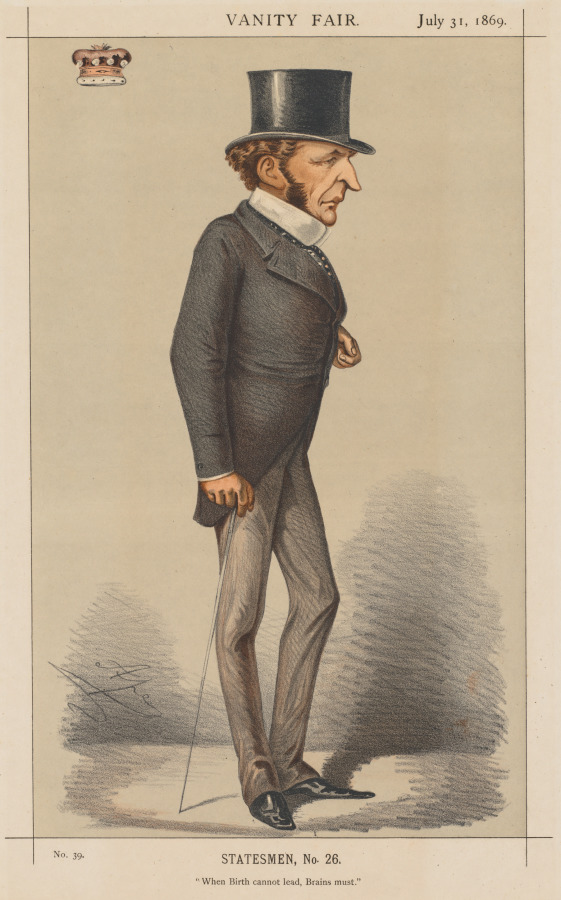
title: Vanity Fair: Statesman No. 26 "When Birth cannot lead, Brains must."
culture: Italy, 19th century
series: published in Vanity Fair July 31, 1869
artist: Carlo (Ape) Pellegrini (Italian, 1839–1889)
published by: Vanity Fair. (Boston: Frame Central, 1992.) p. 1, 31 July, 1869, S. No. 26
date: 1869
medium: color lithograph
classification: Print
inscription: Verso, in graphite: Earl Cairns / 1st Earl / Solicitor & Attorney General, / Lord Justice of Appeal / Lord Chancellor, 1868 & 1874-1880.